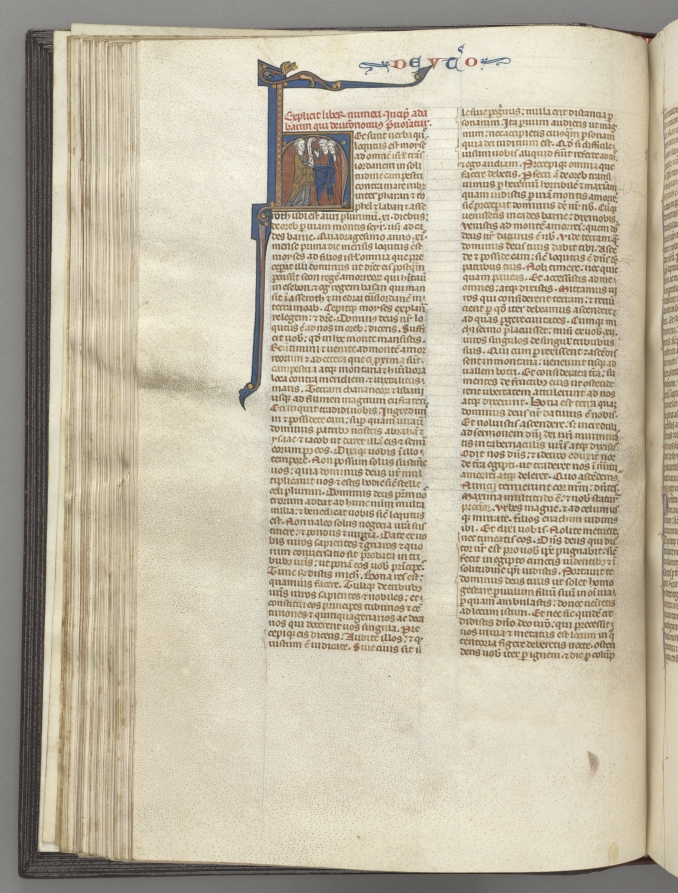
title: Fol. 62v, Deuteronomy, historiated initial H, Moses with horns and scroll preaching to two men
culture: Southern France, Toulouse(?), 13th century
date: c. 1275–1300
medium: ink, tempera and gold on vellum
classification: Bound Volume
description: Biblical manuscripts were highly prized and important possessions of churches, monasteries, cathedral schools, and universities throughout medieval Europe. The biblical texts were known as the vulgate, the translations made by Saint Jerome in the fourth century from Hebrew and Greek into Latin, which became the definitive and official Latin version of the Roman Church. In the 13th century, the bible was, for the first time, produced as a single volume with an officially sanctioned sequence to its books and chapters as illustrated by this example. The very extensive decoration of this bible is arranged hierarchically to indicate the relative importance of the various texts so that full or almost full-page initials mark the openings of the first prologue, Genesis, and the first Gospel; historiated initials mark the beginning of each book and illuminated initials mark the Prologues.